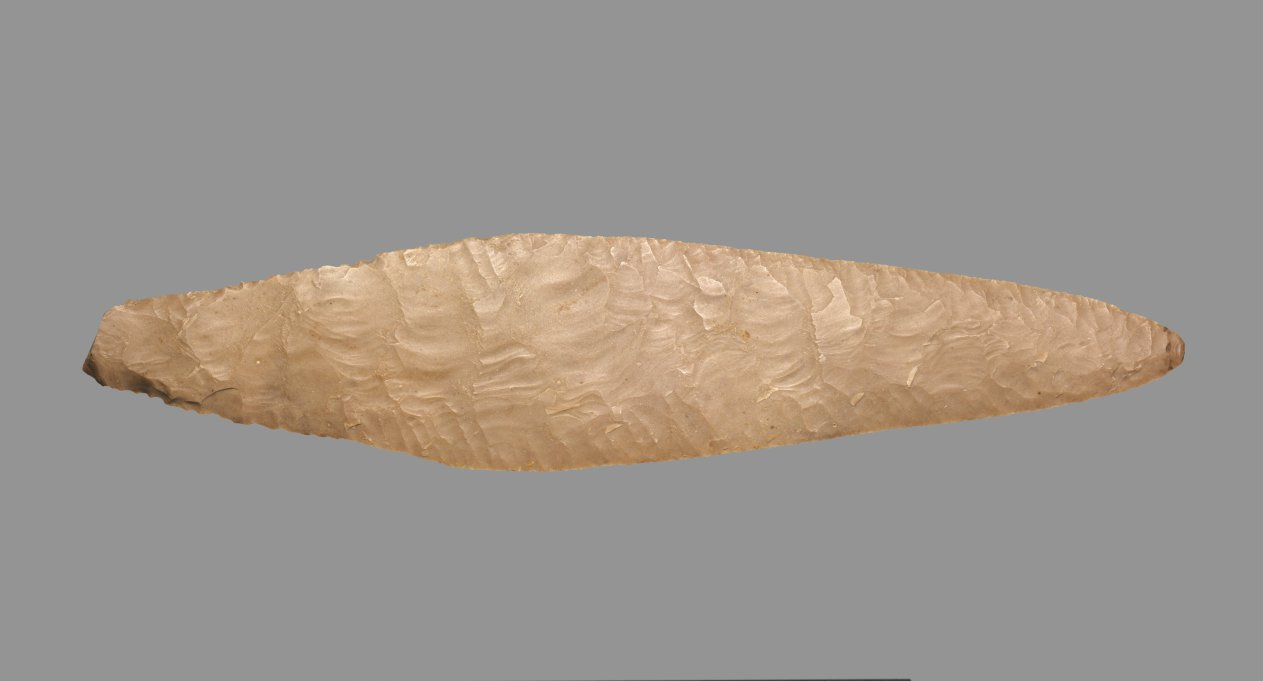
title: Rhomboidal Knife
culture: Egypt, Predynastic (5000–2950 BCE), Naqada Ia–b (3900–3500 BCE)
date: 4500–3500 BCE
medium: light brown flint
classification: Implements